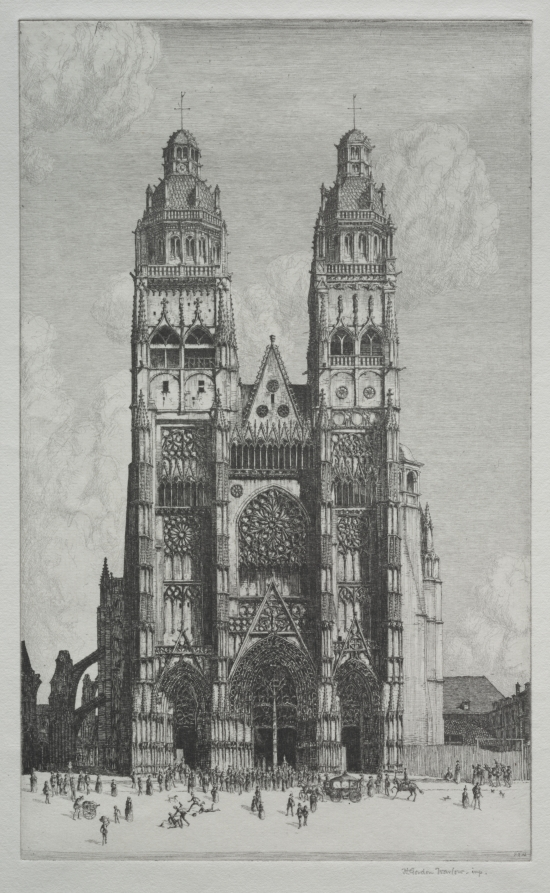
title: St. Gatiens, Tours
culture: England, 20th century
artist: Herbert Gordon Warlow (British, 1885–1942)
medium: drypoint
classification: Print